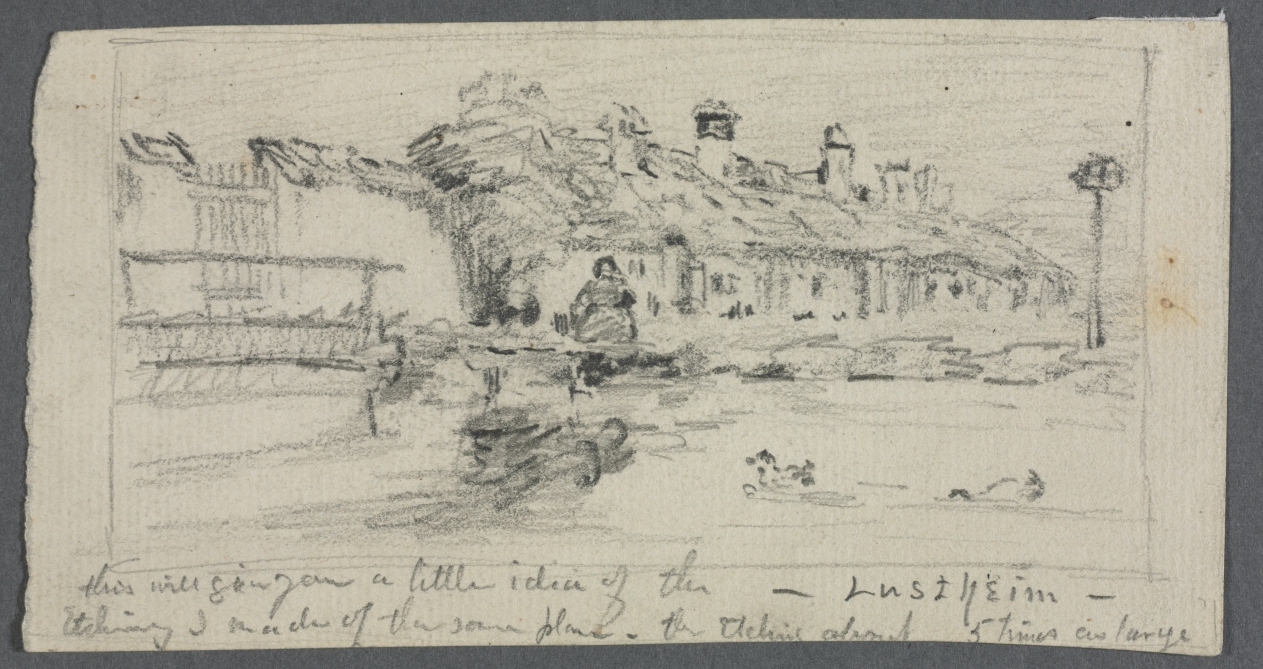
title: Lustheim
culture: America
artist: Otto H. Bacher (American, 1856–1909)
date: c. 1870–1909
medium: pencil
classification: Drawing